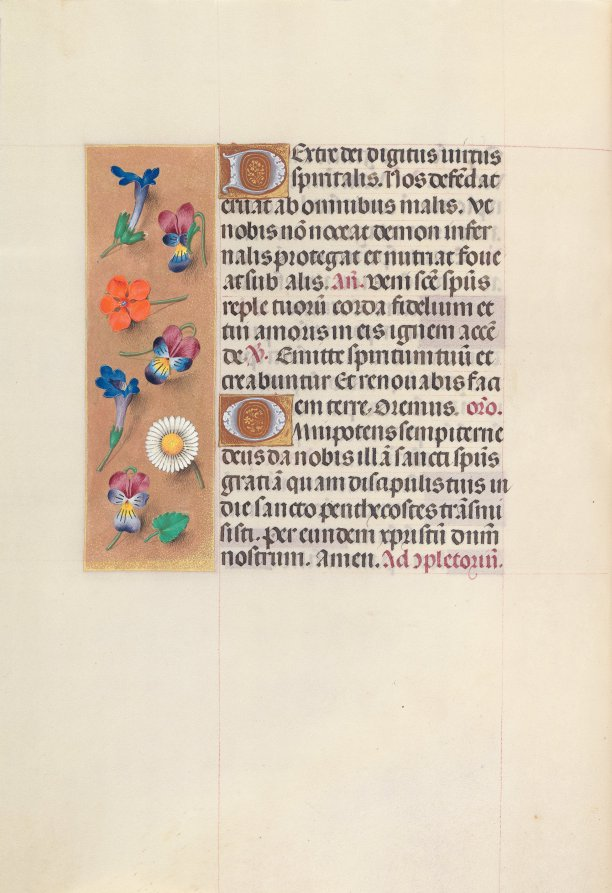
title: Hours of Queen Isabella the Catholic, Queen of Spain: Fol. 35v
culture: Flanders, Ghent and Bruges, late 15th century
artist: Master of the First Prayerbook of Maximillian (Flemish, c. 1444–1519)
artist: and Associates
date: c. 1500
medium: ink, tempera, and gold on vellum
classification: Bound Volume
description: This manuscript was illuminated by a circle of at least five highly organized manuscript painters active in the Flemish cities of Ghent and Bruges. The principal illuminator was Alexander Bening, who painted the majority of the book's miniatures. Manuscripts produced by this circle of artists are renowned for the decoration of their borders, which typically feature a rich variety of realistically-painted flowers, birds, and butterflies. This prayer book, called a book of hours, was intended not for a cleric, but for the private devotions of a lay person-in this case, Isabella the Catholic, Queen of Spain (1451-1504). Isabella's coat of arms embellishes the book's frontispiece. It is unlikely that the book was commissioned by the Queen herself; rather, she probably received it as a diplomatic gift from someone courting her patronage, perhaps Cardinal Francisco Jimenez de Cisneros. A Franciscan friar, Jimenez was dependent upon Isabella for his advancement, first to the post of Queen's confessor in 1492, and then to Archbishop of Toledo in 1495.